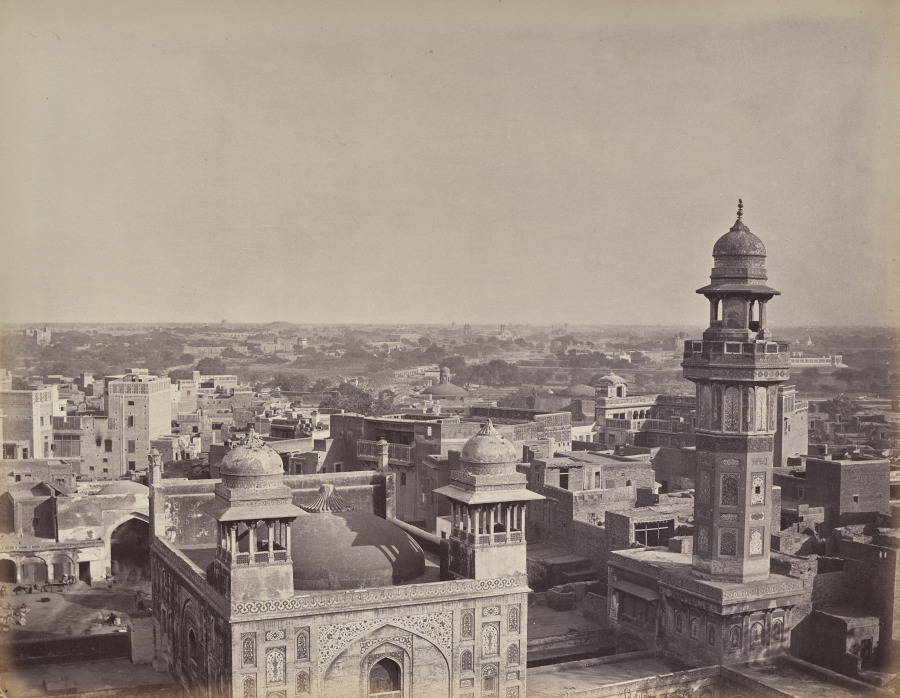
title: The City of Lahore. Another View Taken from Huzeer Khan's House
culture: England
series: Photographs of Northern India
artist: Samuel Bourne (British, 1834–1912)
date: 1863–70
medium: albumen print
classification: Photograph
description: The 50 images in this album, all taken in the 1860s, move from the hill towns of the Himalayas down to cities including Lahore (now in Pakistan), Delhi, Lucknow, Agra, Benares (now Varansi), and Calcutta (now Kolkata). Architectural studies of major monuments offer valuable historical records of what sites such as the Taj Mahal and the imperial mosque of the Mughal emperors in Delhi looked like before twentieth-century restorations.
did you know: Samuel Bourne, the author of most the images in this album, was a banker in England before he moved to India to become a professional photographer.